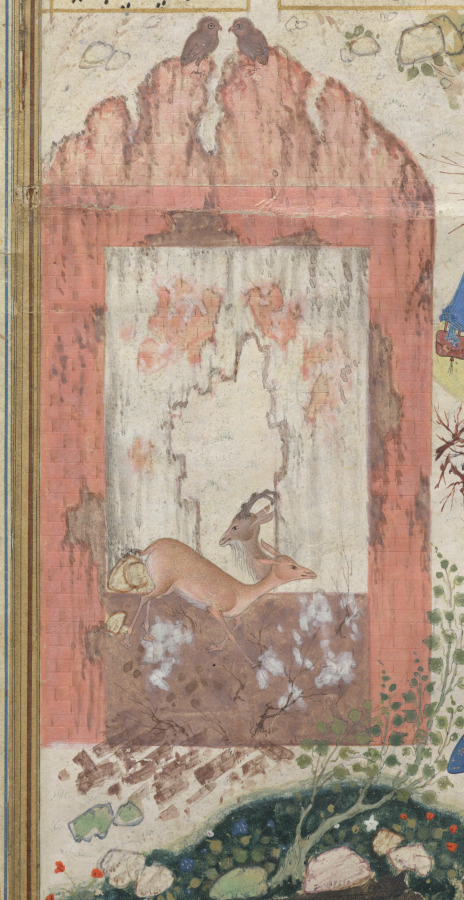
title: Nushirwan Listens to the Owls (recto): Illustration and Text, Persian Verses, from a Manuscript of the Khamsa of Nizami, Makhzan al-Asrar [Treasure of Secrets]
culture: Iran, Qazvin, Safavid period (1501-1722)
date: 1555–65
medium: opaque watercolor, ink, and gold on paper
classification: Manuscript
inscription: script: Nasta'liq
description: This scene is from the Makhzan al-Ashrar, the first of the Quintet. Although more historically oriented than the following poems, it served more as a vehicle for moralizing tales than for historical events. In this scene Nushirwan asks the sage Buzurgmihr to explain what the owls perched on a ruined building are saying. He explains that one owl is offering the other as many ruined cities as he likes in exchange for his daughter's hand. He thus reproves Nushirwan for his love of conquest and war and the consequent destruction of many cities.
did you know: King Nushirwan is on a white horse, while his minister Buzurjmihr is riding a mule.